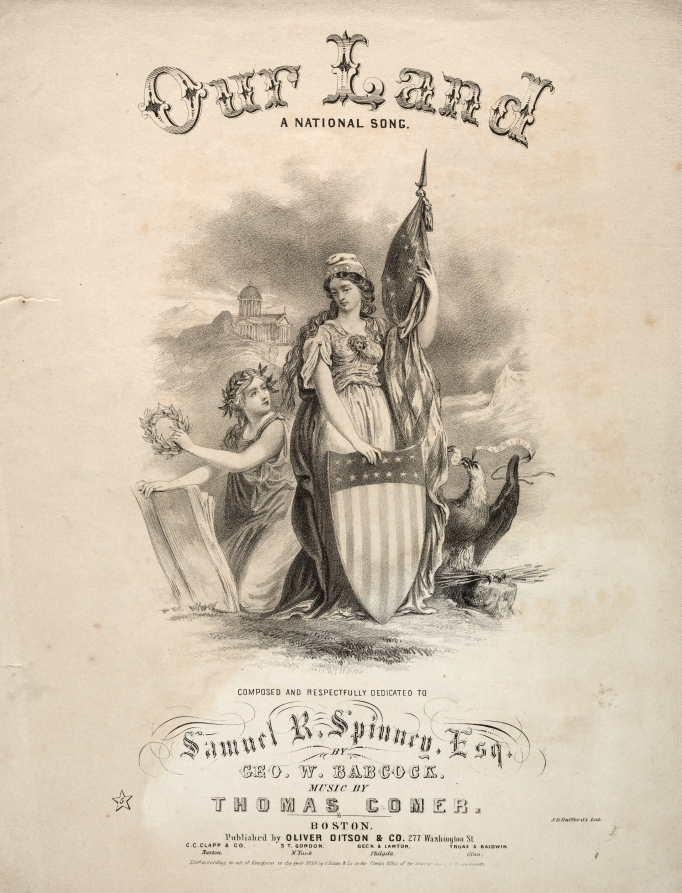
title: Our Land - Sheet Music Cover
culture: America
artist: Winslow Homer (American, 1836–1910)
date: c. 1858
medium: lithograph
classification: Print